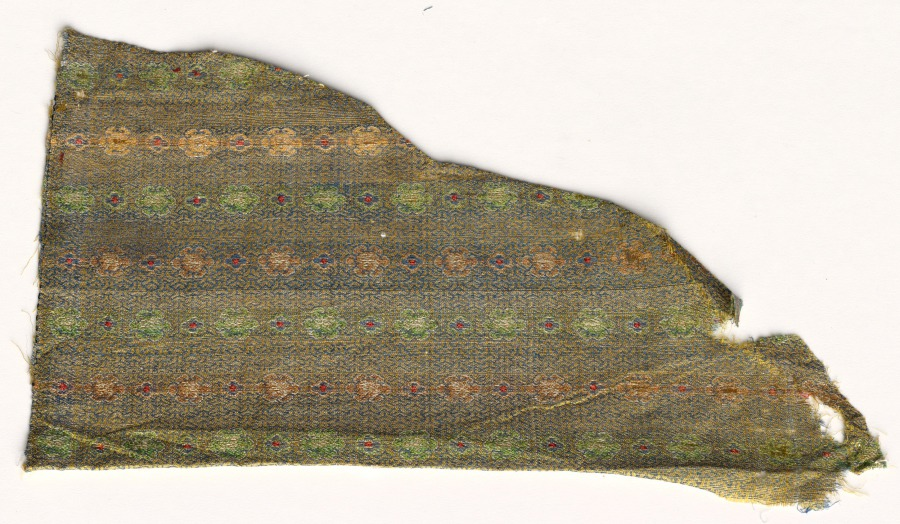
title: Fragment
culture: China, 19th century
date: 1800s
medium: silk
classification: Textile